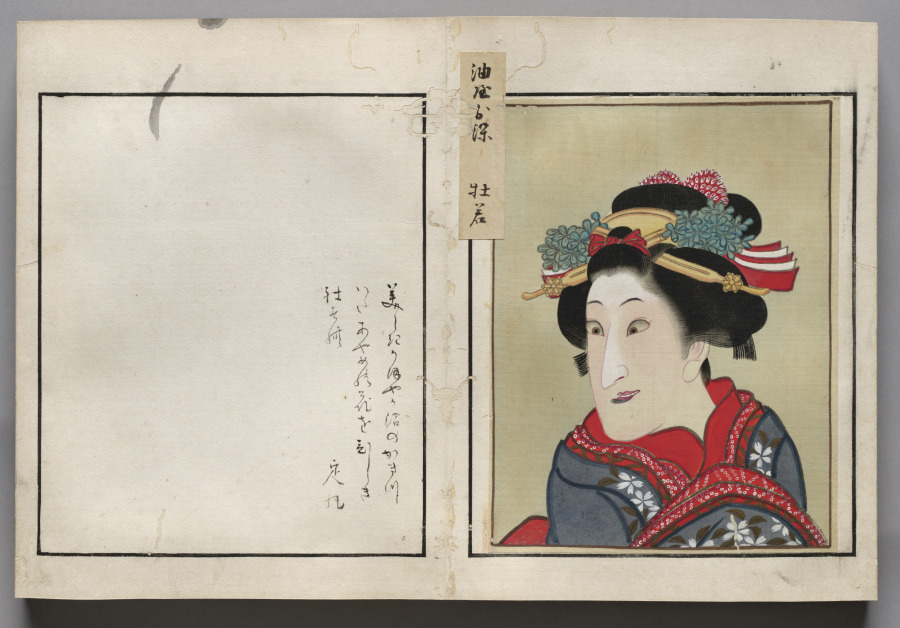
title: Double-Leaf from Album of Actor Portraits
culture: Japan, Edo period (1615–1868)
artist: Shōrakusai (Japanese)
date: c. 1790–1810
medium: double-leaf from an accordion-style album; ink and color on silk (right) and ink on paper (left)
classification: Bound Volume